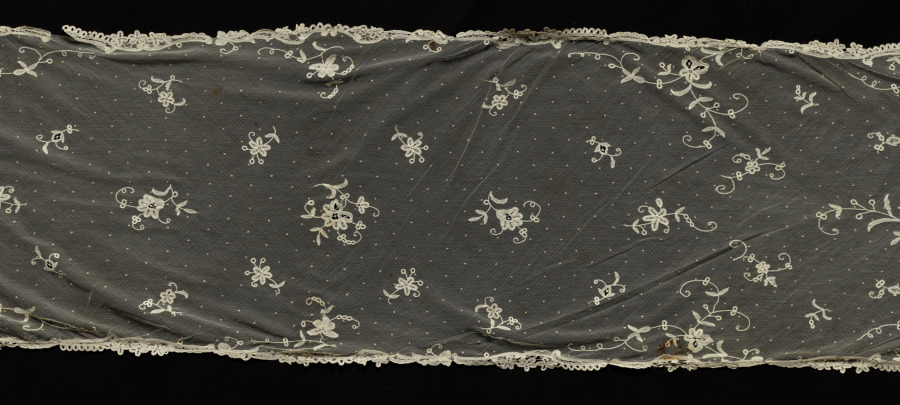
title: Lace Scarf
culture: Belgium, Brussels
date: 1800s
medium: Machine-made lace net: linen bobbin lace appliqué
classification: Lace